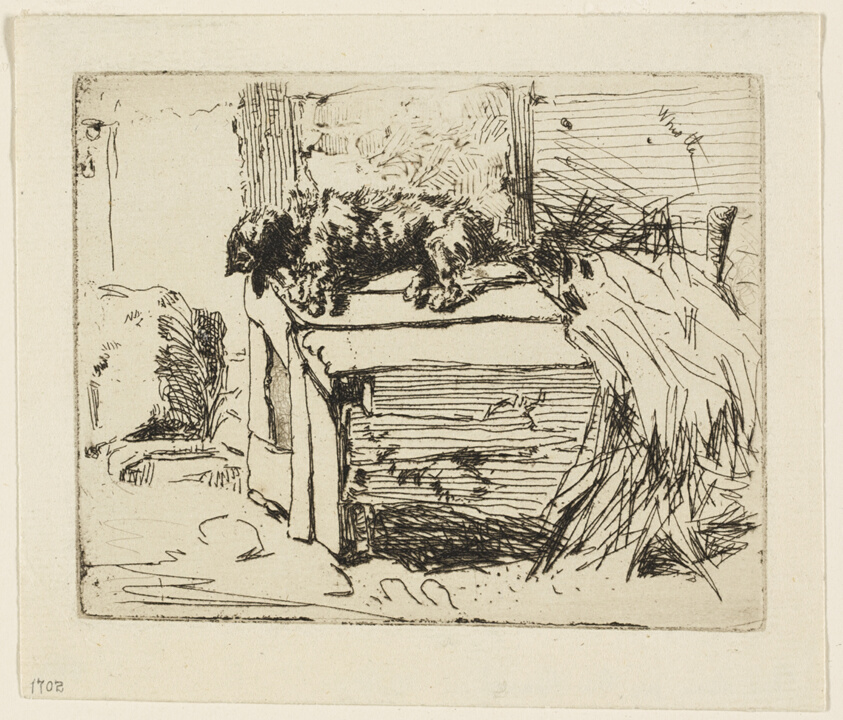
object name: Print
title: The Dog on the Kennel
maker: James McNeill Whistler (American, 1834-1903)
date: 1858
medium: Etching in black ink on off-white laid paper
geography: United States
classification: etching; print; prints and drawing; paper